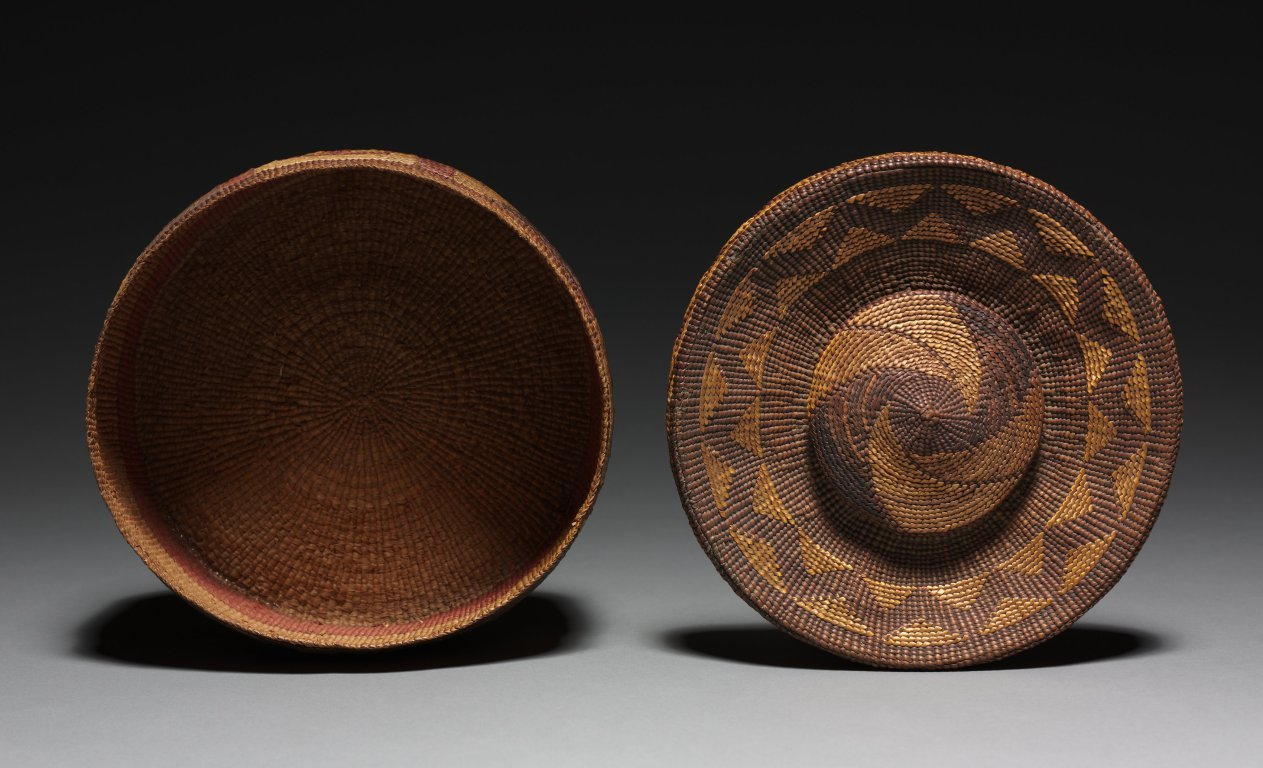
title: Basket with Rattle Top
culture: Northwest Coast, Tlingit, 20th century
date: before 1929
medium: twined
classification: Basketry